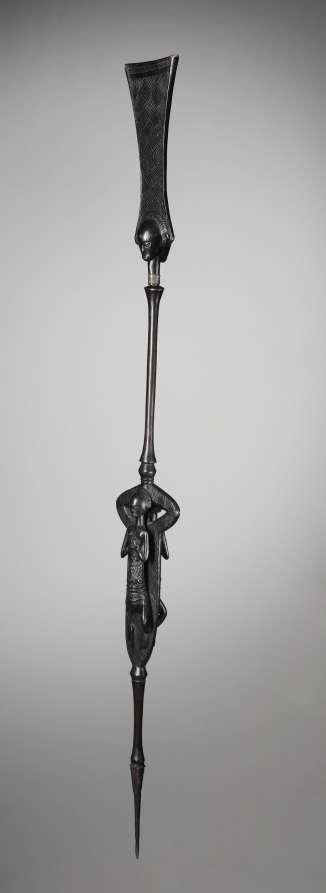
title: Staff of Office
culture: Central Africa, Democratic Republic of the Congo, Luba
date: early to mid-1800s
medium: Wood and iron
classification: Sculpture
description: Sanctified by a ritual specialist and enhanced with medicinal substances, the staff possessed supernatural qualities and was endowed with healing power. Luba staffs are among the most important regalia of Luba kings. The metal point alludes to the kingdom's stability and durability. Each staff has its own distinctive iconography to reflect regional styles. As Chief Msidi (former owner of this staff) ruled over the Yeke kingdom (and not the Luba kingdom), it begs the question of how he acquired this symbol of another realm's power.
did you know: The Yeke kingdom ruler Chief Msidi gave this as a gift of appreciation to the British missionary Frederick Stanley Arnot, whom the chief had invited to his kingdom.